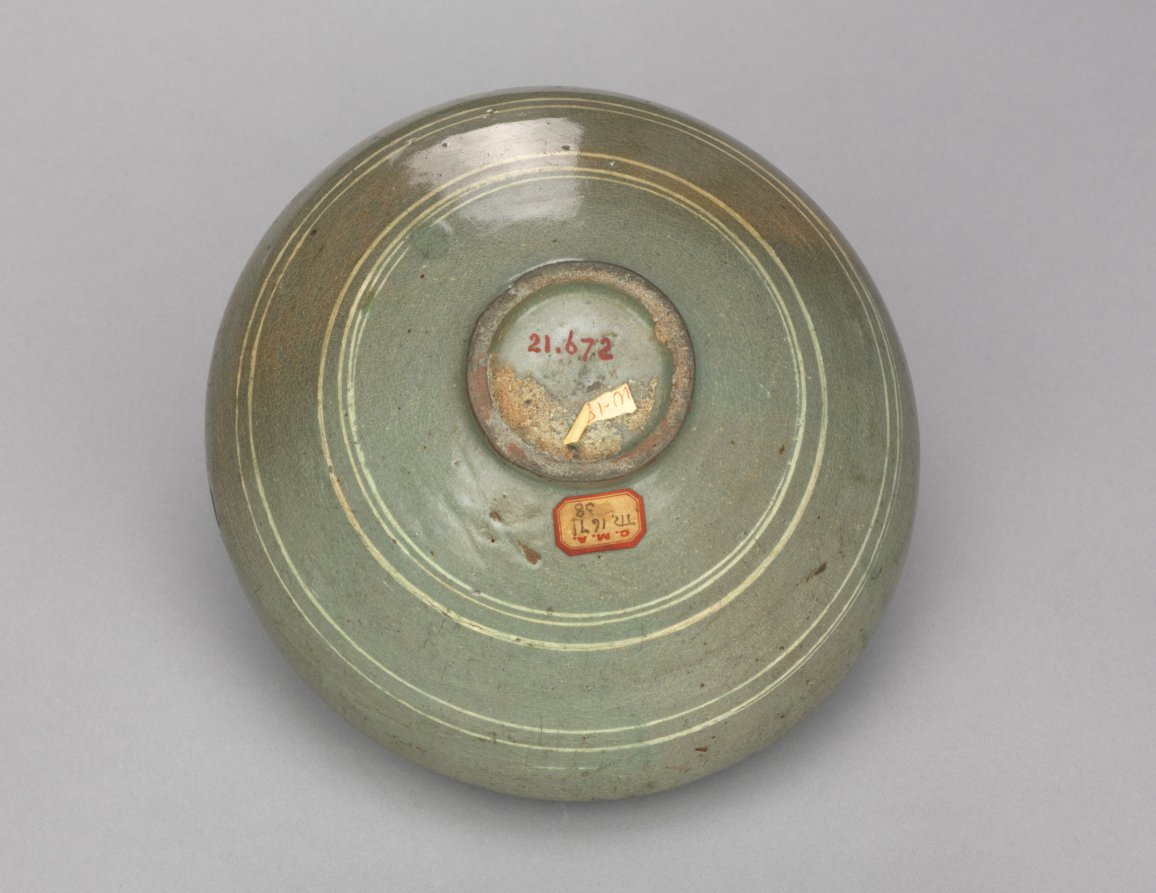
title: Bowl with Willow and Reed Design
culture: Korea, Goryeo dynasty (918–1392)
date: 1300s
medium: pottery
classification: Ceramic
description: A wide bowl like this example was especially suitable for drinking powdered tea shaved from a compressed tea cake, the most commonly enjoyed type during the Goryeo period. The inlaid image of weeping willow trees appears as a main decoration pattern on the inner wall of this bowl.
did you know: This bowl with a lightly bent inward rim possibly takes the shape of an alms bowl by Buddhist monks.